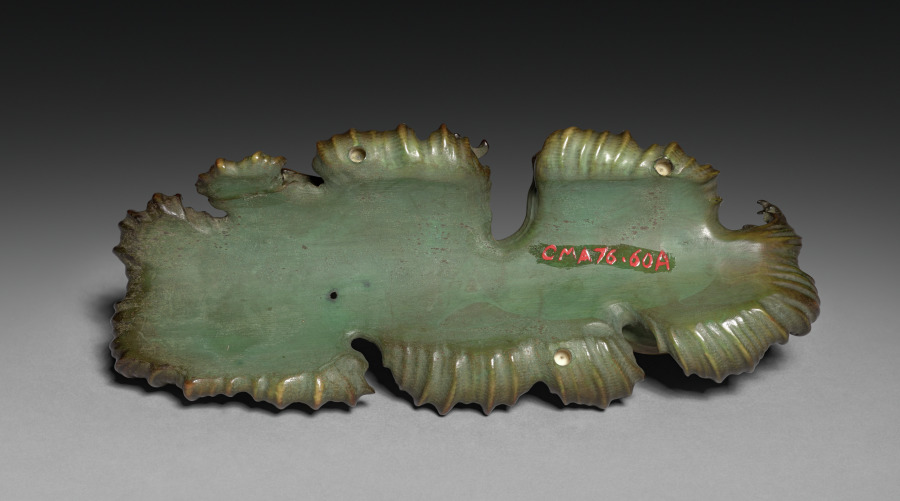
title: Figure of Daoist Immortal He Xiangu (base)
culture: China, Qing dynasty (1644-1911)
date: 1700s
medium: Colored ivory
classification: Wood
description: He Xiangu is one of the Eight Immortals in the Daoist pantheon. She was thought have been a real person who lived in the Tang dynasty, originally named He Qiong. As a teenager, she was instructed in a dream to eat powdered mica to become immune from death and to vow to remain unmarried. She did so and became an enlightened practitioner of Daoism. In this delicate carving, He Xiangu is placidly seated in a gnarled and knotty wooden raft amid green-tinted ivory waves. In front of her rests a bamboo basket filled with objects associated with Daoist immortality, while she holds a branch of lingzhi fungus.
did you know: He Xiangu's boat rests on a wave-shaped base carved from ivory that has been dyed green.